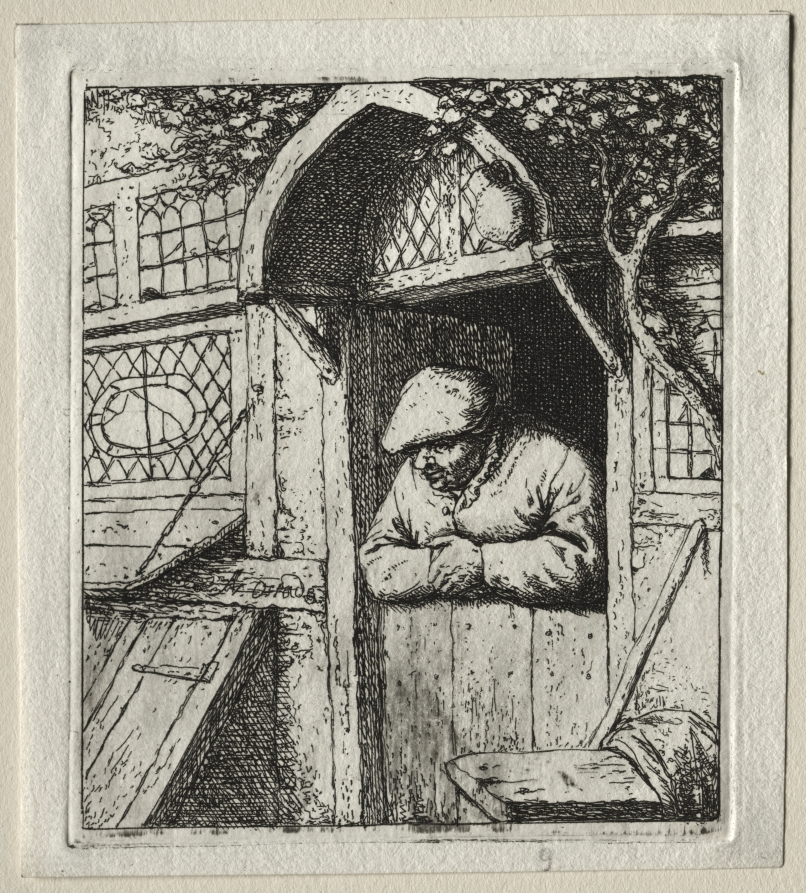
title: Peasant Leaning on his Doorway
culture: Netherlands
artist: Adriaen van Ostade (Dutch, 1610–1684)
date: c. 1653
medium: etching and drypoint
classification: Print